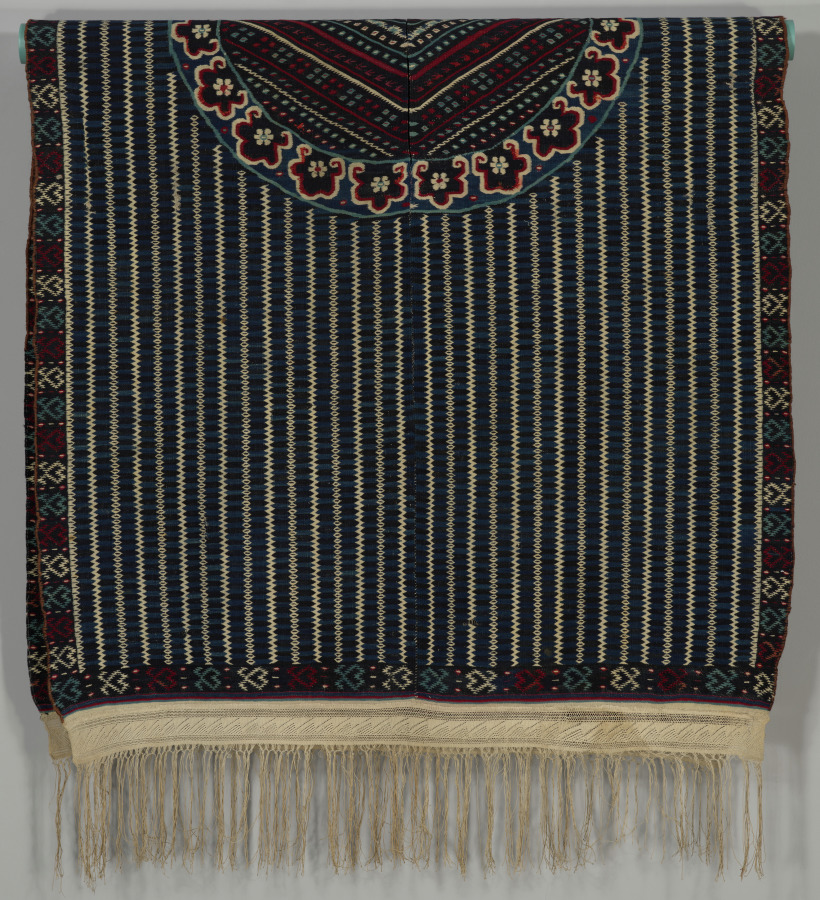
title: Saltillo Sarape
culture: Mexico, Coahuila state, Saltillo Region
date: c. 1840–60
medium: Wool, cotton; tapestry weave, macramé fringe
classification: Textile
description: The sarape (wearing blanket) is a classic Mexican men’s garment that became a symbol of national identity and pride after Mexico achieved independence from Spain in 1821. Examples woven between about 1750 and 1875 in Saltillo, a town in northern Mexico, are the sarape’s most famous representatives, prized for their design, color, and technical refinement.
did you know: Saltillo sarapes (wearing blankets) are prized for their design, color, and technical refinement.